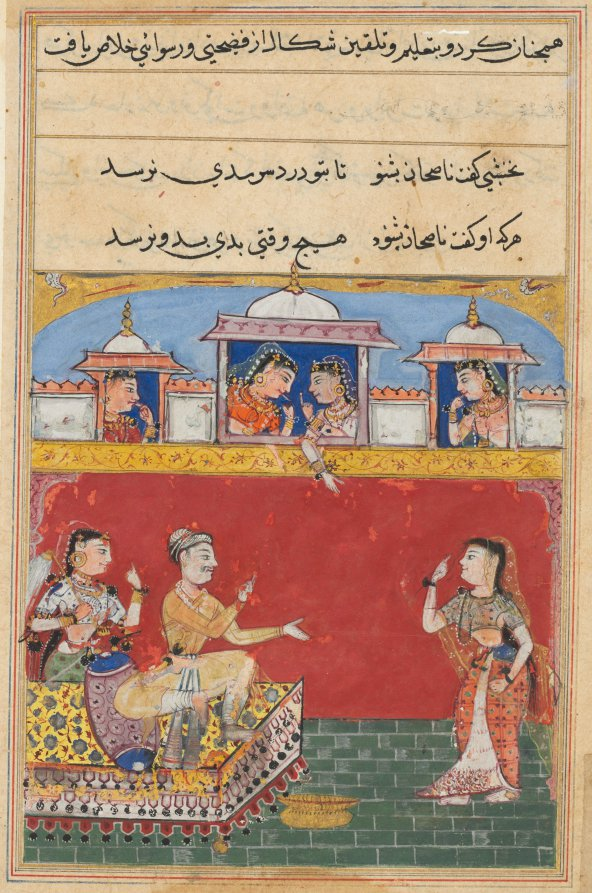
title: The daughter-in-law returns from her misadventure, feigning insanity, from a Tuti-nama (Tales of a Parrot): Sixteenth Night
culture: Mughal India, court of Akbar (reigned 1556–1605)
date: c. 1560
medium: gum tempera, ink, and gold on paper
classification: Painting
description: After a failed love affair, the daughter-in-law of the king of Banaras returns home to her husband. Her disheveled hair and lack of jewelry support her claims of insanity and hide the evidence of her true whereabouts. The woman is greeted by the king, who sits with one of his attendants. In the chambers above them, a group of women look on in surprise.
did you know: An arm visible beneath the central chamber indicates that a smaller figure has been overpainted.